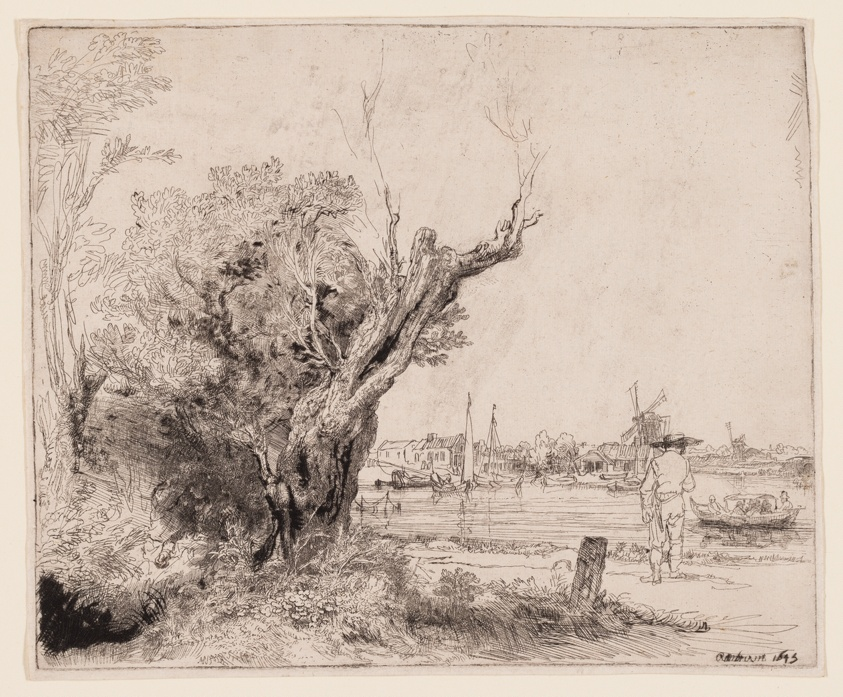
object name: Print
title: The Omval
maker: Rembrandt van Rijn (Dutch, 1606-1669)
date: 1645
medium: Etching and drypoint on white laid paper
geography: Holland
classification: etching; print; prints and drawing; paper; drypoint